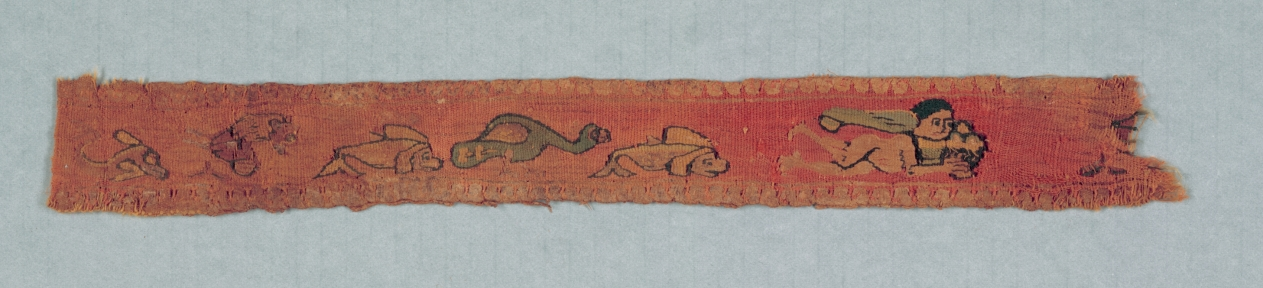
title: Fragment from a Child's Tunic: Clavus II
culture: Egypt, Umayyad period (661–750)?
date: 600s–700s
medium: Wool and linen: tabby weave, inwoven tapestry ornament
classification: Textile